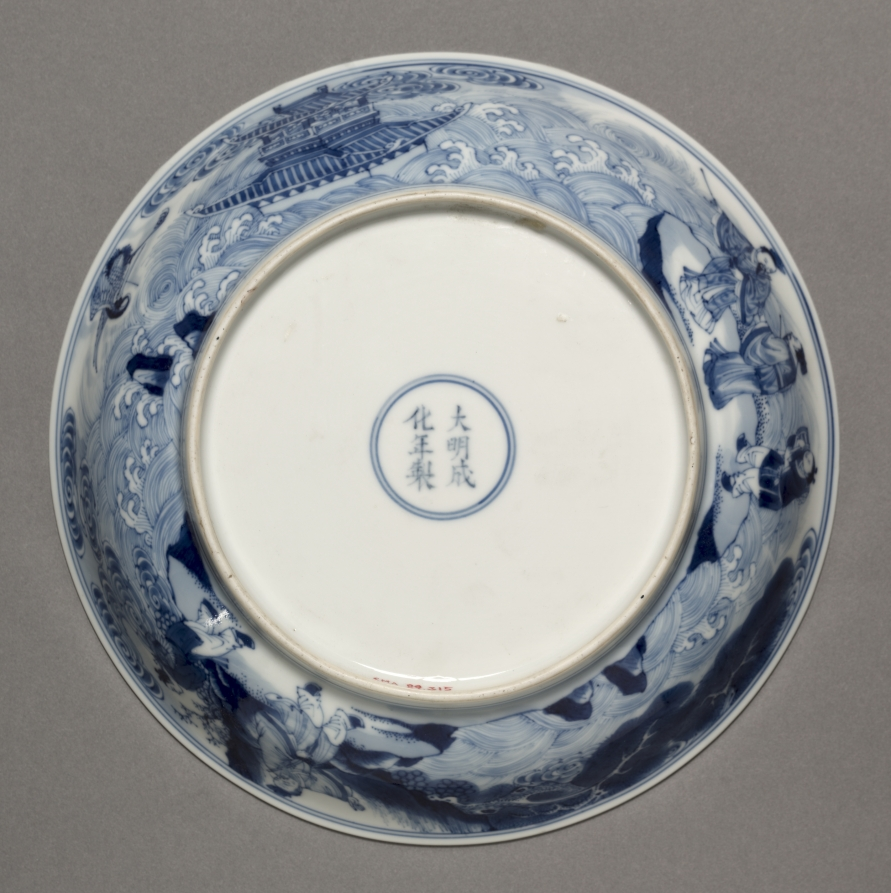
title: Dish with Laozi Riding a Water Buffalo (interior); Pavilion and Immortals in Rocky Landscape (exterior)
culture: China, Jiangxi province, Jingdezhen kilns, Qing dynasty (1644-1911), Yongzheng reign (1723-35)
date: 1723–35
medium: porcelain with underglaze blue decoration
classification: Ceramic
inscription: 大明成化年製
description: Daoism traces its origins to Laozi, a sage believed to have lived in the sixth century BC, who was the reputed author of the Daode jing (Classic of the Way), a fundamental text for Daoism. The interior of this dish depicts the elderly Laozi riding a buffalo. He is accompanied by three servants and is greeted by a scholarlike figure. This dish borrows brush and shading techniques typically employed by artists who paint on paper or silk, a development frequently seen in porcelain decoration around the 1700s.